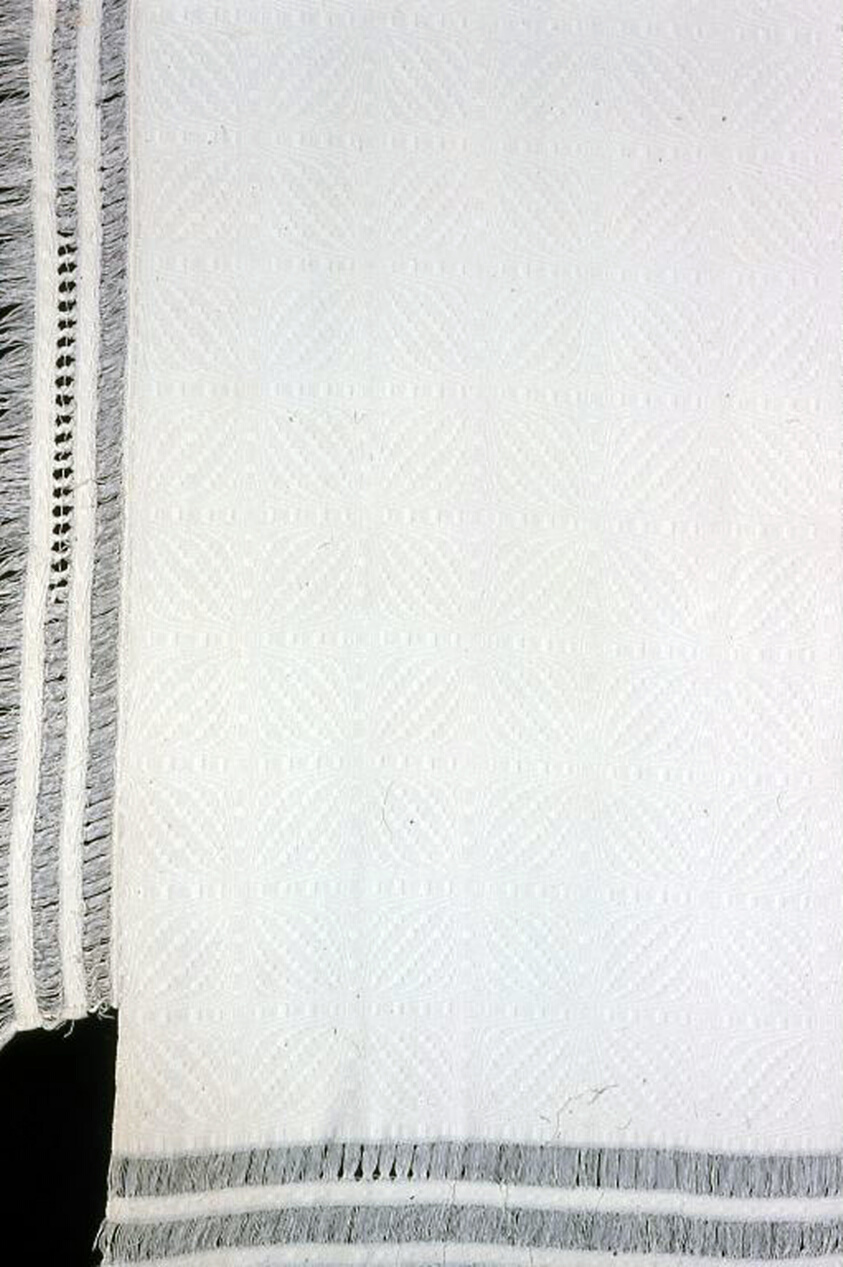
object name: Textile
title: Coverlet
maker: New England, United States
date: 1800/25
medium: Cotton and wool, plain weave with supplementary patterning wefts (overshot); three loom widths joined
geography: New England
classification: weaving - coverlet; coverlet; weaving; textile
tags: coverlet